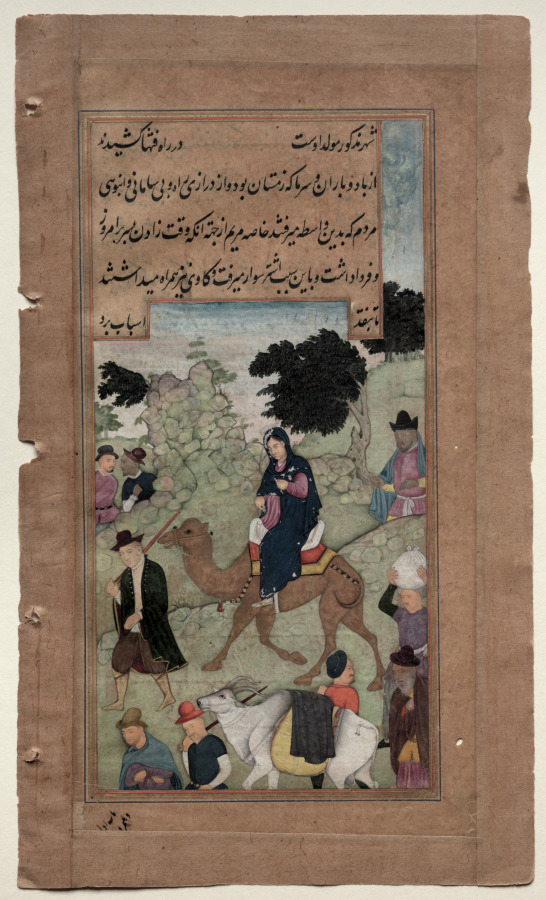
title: Mary and Joseph Travel to Bethlehem (folio 24 verso), from a Mirror of Holiness (Mir’at al-quds) of Father Jerome Xavier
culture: Mughal India, Allahabad, made for Prince Salim (1569–1627)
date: 1602–4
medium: Gum tempera, ink, and gold on paper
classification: Manuscript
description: Joseph leads the heavily pregnant Mary riding on a camel. In the text Father Jerome wrote that Mary rode a “pack beast,” so the Indian artist opted to portray her on a camel. An ox in the foreground carries their belongings, and the bent trees indicate the journey’s harsh conditions. They are on the way to Bethlehem, the city of King David, from whom Joseph was descended, in order to register for a census. Father Jerome often emphasized the royal lineage of Jesus, apparently in an effort to impress the Mughals.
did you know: Wearing a green coat, Joseph carries a sword over his shoulder, suggesting that he is ready to face any potential trouble.